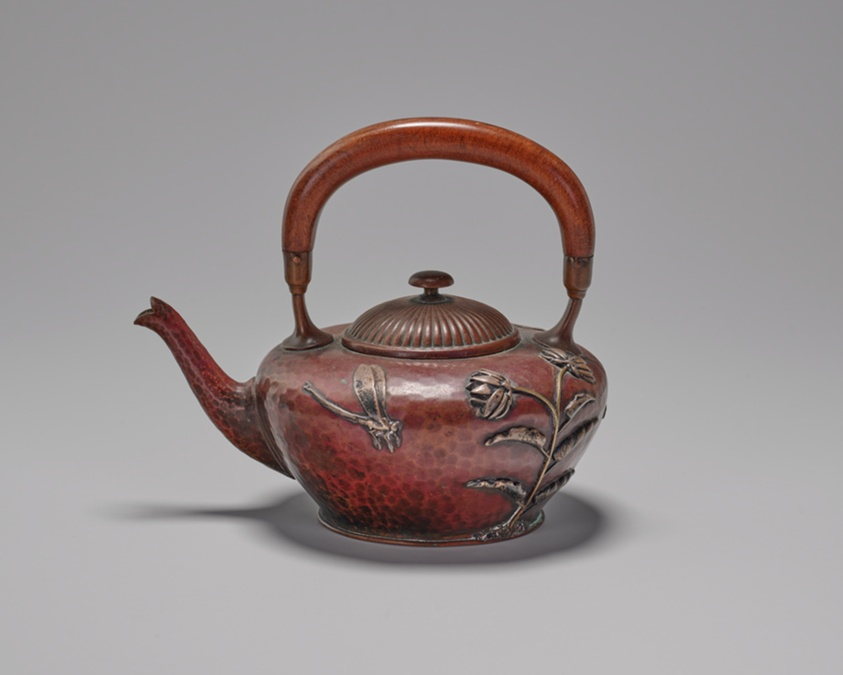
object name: Decorative Arts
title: Tea Kettle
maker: Gorham Manufacturing Company (American, founded 1831); Providence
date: c. 1900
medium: Copper, mixed metals, and wood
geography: Providence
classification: american decorative arts; decorative arts